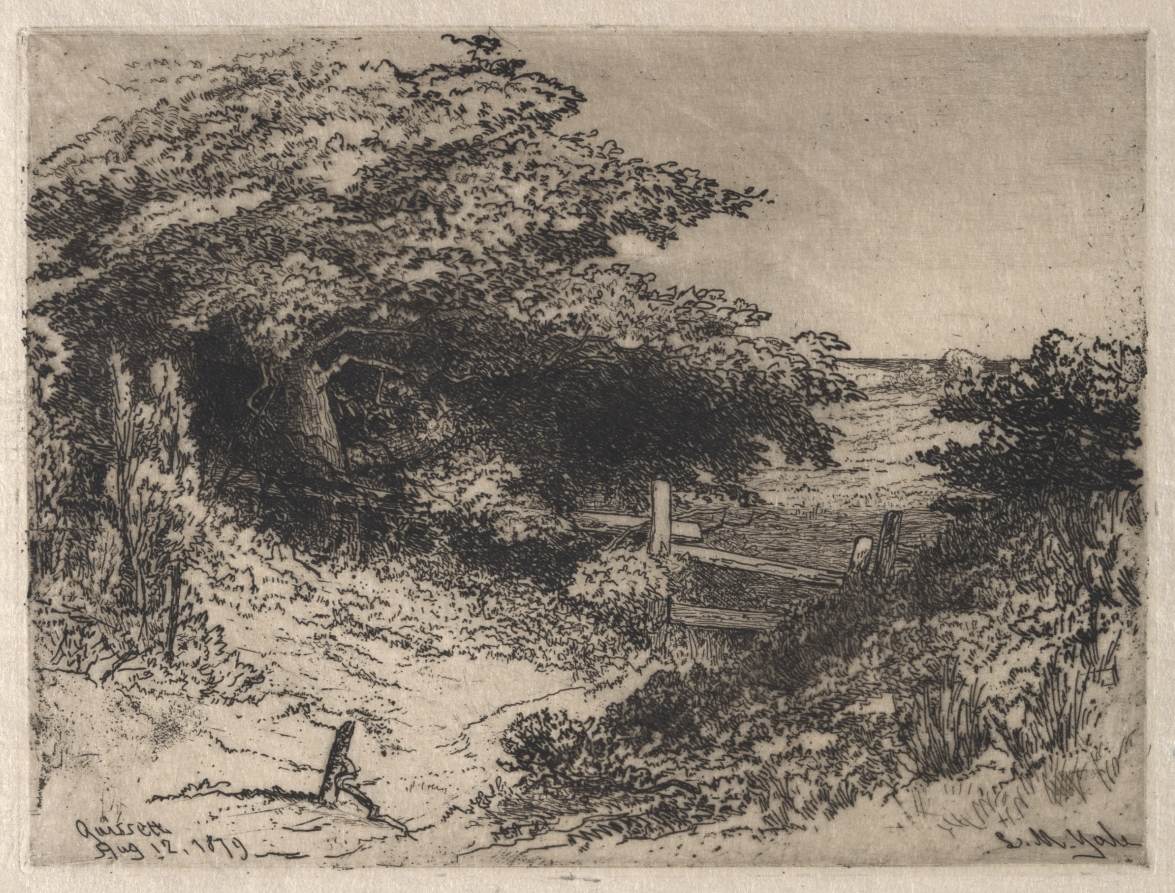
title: Quissett, Barnstable County, Massachusetts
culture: America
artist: Leroy Milton Yale (American, 1841–1906)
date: 1879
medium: etching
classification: Print